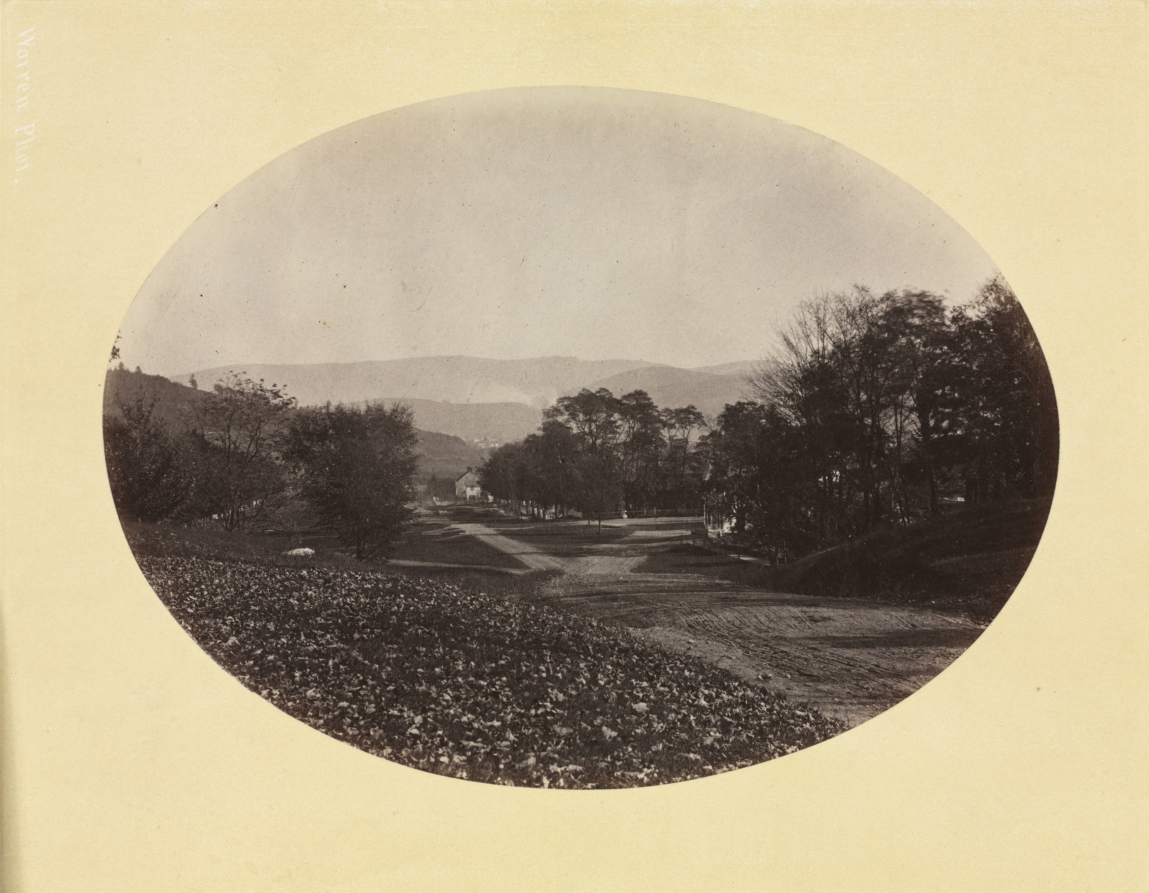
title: A Road in Williamstown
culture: America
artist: George K. Warren (American, 1834–1884)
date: c. 1870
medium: albumen print from wet collodion negative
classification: Photograph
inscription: Written in pencil in lower recto of mount: "+1102" Written in pencil on verso of mount: "3.5 Williamstown, Ma c. 1870"